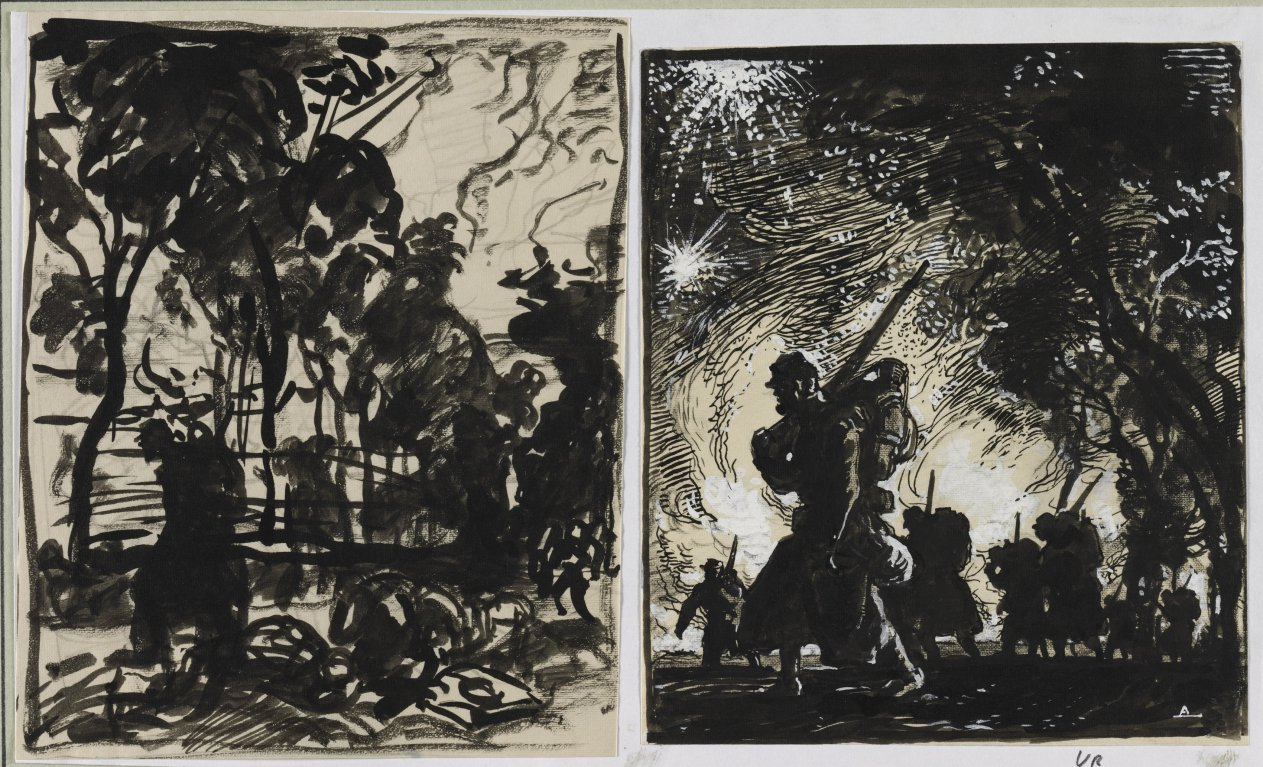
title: Scène nocturne; patrouille à la lisière d'un bois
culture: France, 20th century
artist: Auguste Louis Lepère (French, 1849–1918)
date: 1914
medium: brush and black ink, black crayon, heightened with white gouache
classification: Drawing